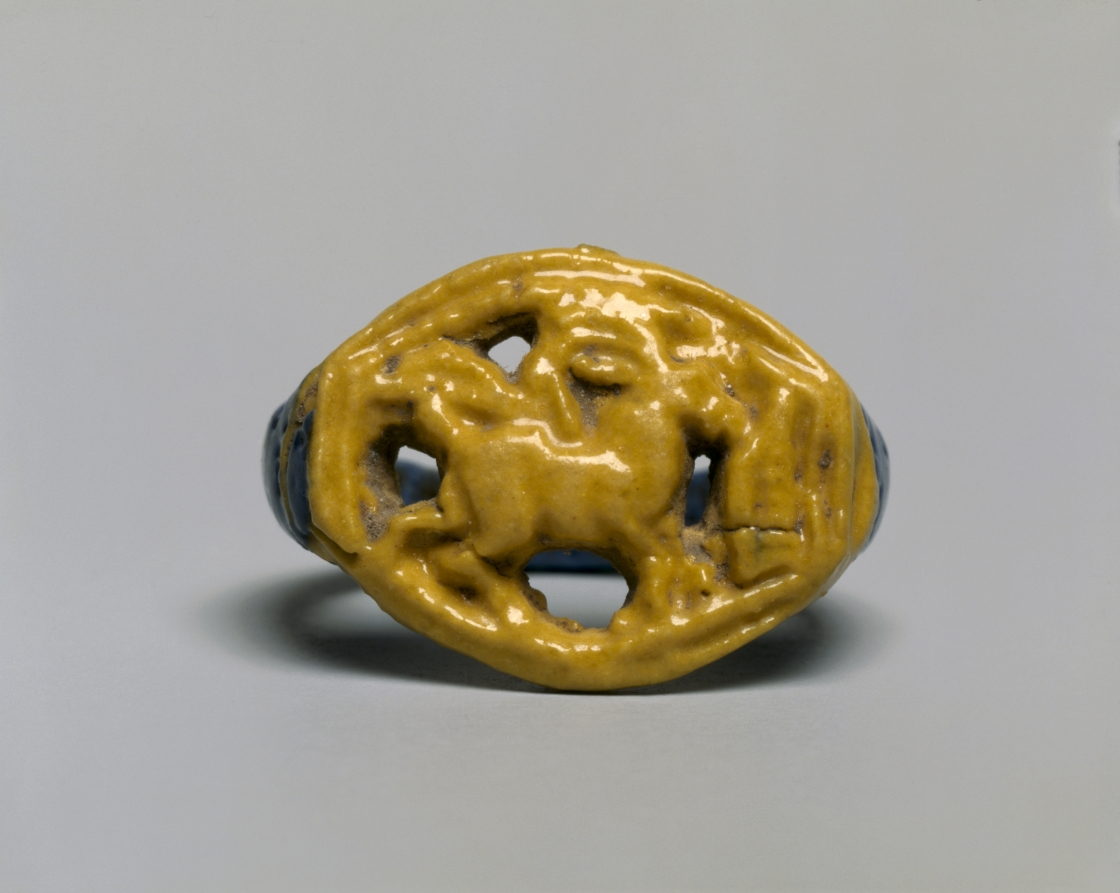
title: Ring: Gazelle Eating Thicket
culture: Egypt, New Kingdom (1540–1069 BCE), Dynasty 18, reign of Amenhotep III (1390–1352 BCE)–reign of Akhenaten (1351–1334 BCE)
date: 1391–1353 BCE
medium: polychrome faience (yellow and purple)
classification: Jewelry